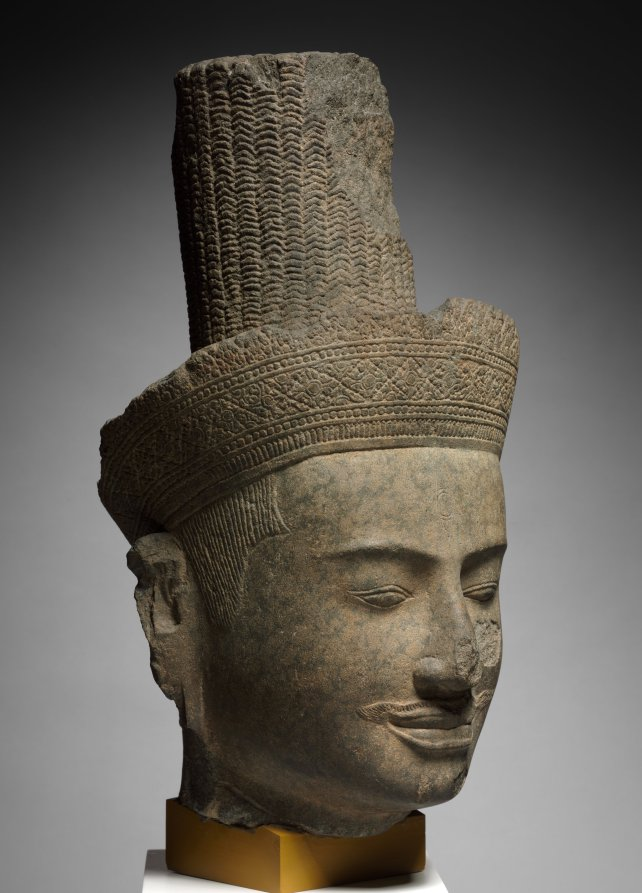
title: Head of Shiva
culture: Cambodia, Angkor, 12th century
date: 1100s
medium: sandstone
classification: Sculpture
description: Khmer patrons and artists produced works of art that could depict either a deified king or a god who has royal attributes. The Khmer cult of the god-king allowed for such fluidity of interpretation. Presence of a third eye in the forehead and matted locks of hair are attributes both of the Hindu god Shiva and the followers who emulated him in order to get closer to him.